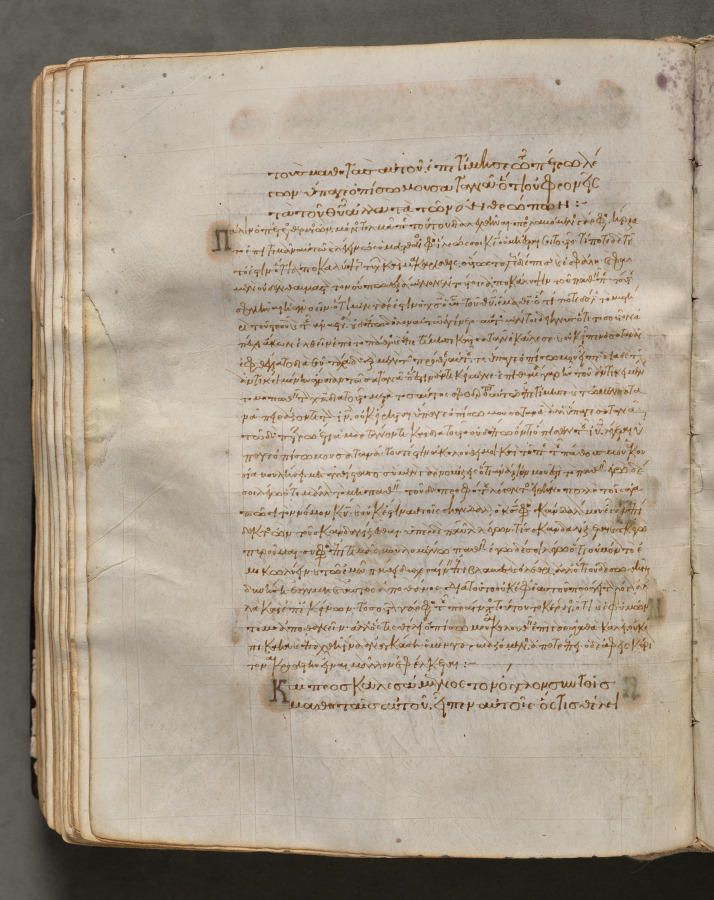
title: Text, folio 159 (verso), from a Gospel Book with Commentaries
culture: Byzantium, Constantinople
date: c. 1000–1100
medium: ink, tempera, and gold on vellum; leather binding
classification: Bound Volume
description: Each of the four gospels in this book opens on a page with brilliantly illuminated borders depicting the author of the text as well as birds-principally peacocks, symbols of the immortality of the soul-and fountains, representing the fountain of life and the salvation of the soul. This volume consists of 428 leaves with texts in Greek. Its level of sophistication suggests that it was probably written and decorated in a monastery in Constantinople.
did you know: Gospel Books were carried in procession through Byzantine churches.